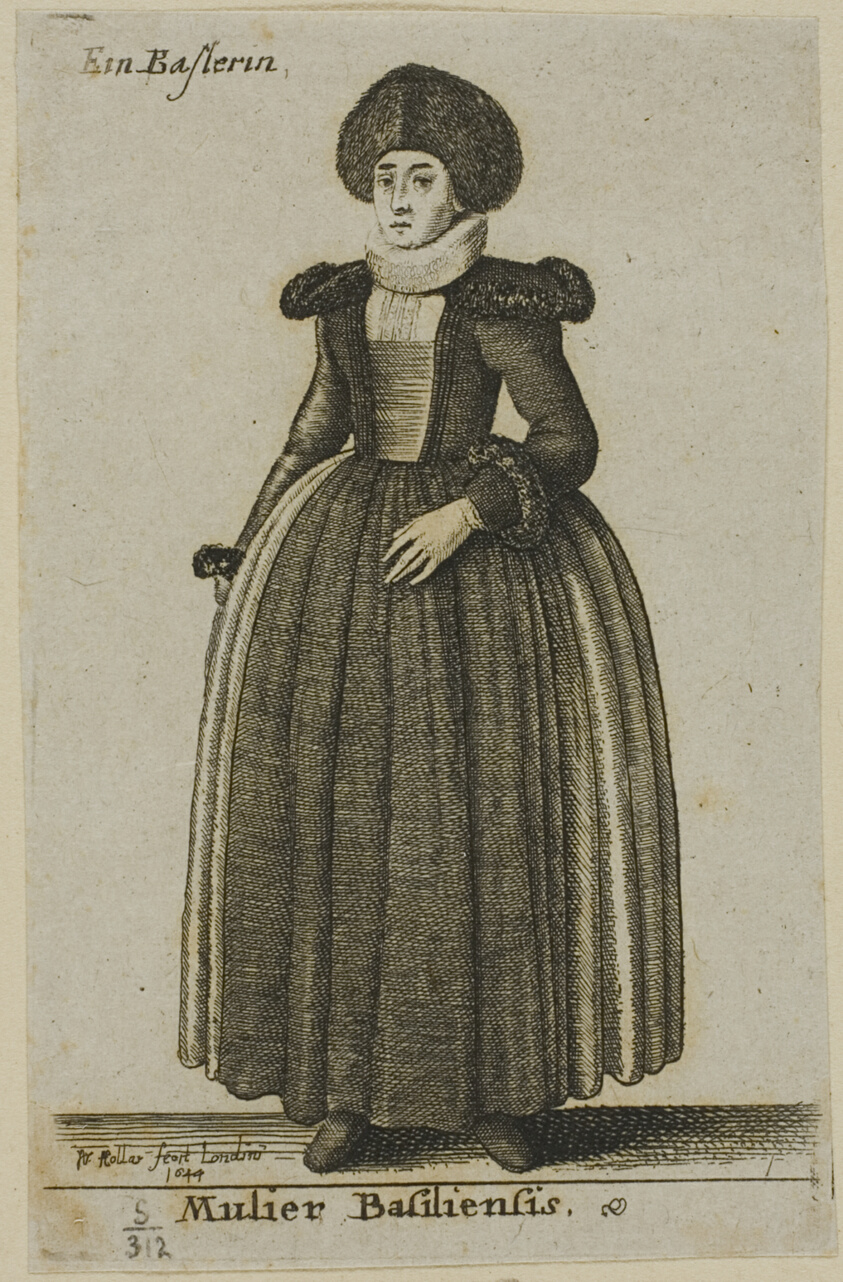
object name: Print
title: Woman of Basel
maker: Wenceslaus Hollar (Bohemian, 1607-1677)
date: 1644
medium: Etching on gray Asian paper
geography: Bohemia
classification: etching; print; prints and drawing